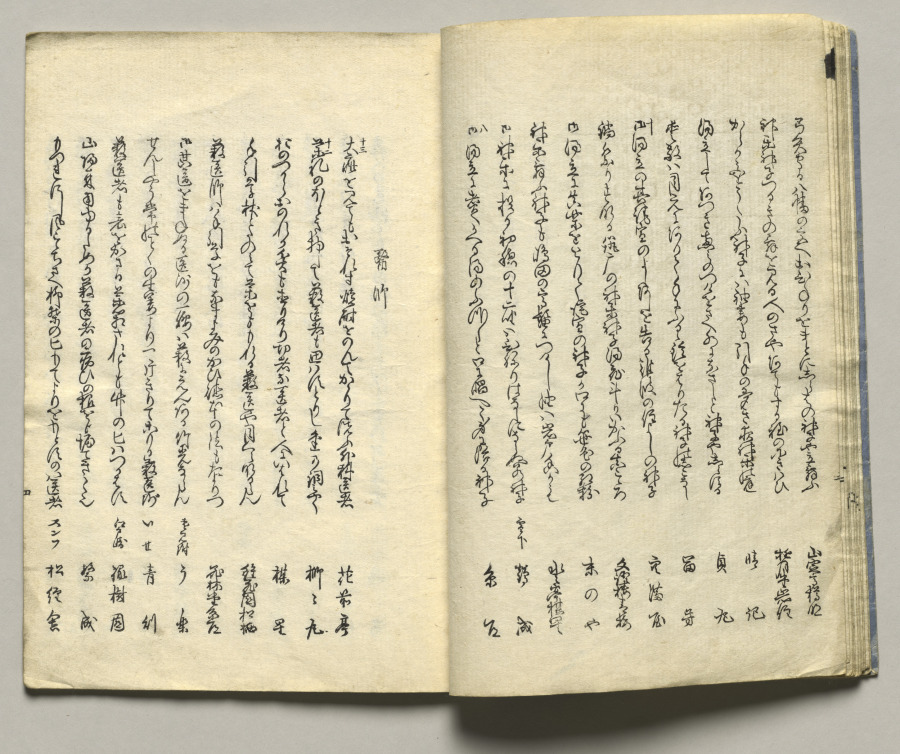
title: Spread Twelve from Volume One of People of Japan in Light Verse (Kyōka)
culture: Japan, Edo period (1615–1868)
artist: Utagawa Hiroshige (Japanese, 1797–1858)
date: 1857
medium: Woodblock-printed book; ink and color on paper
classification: Bound Volume